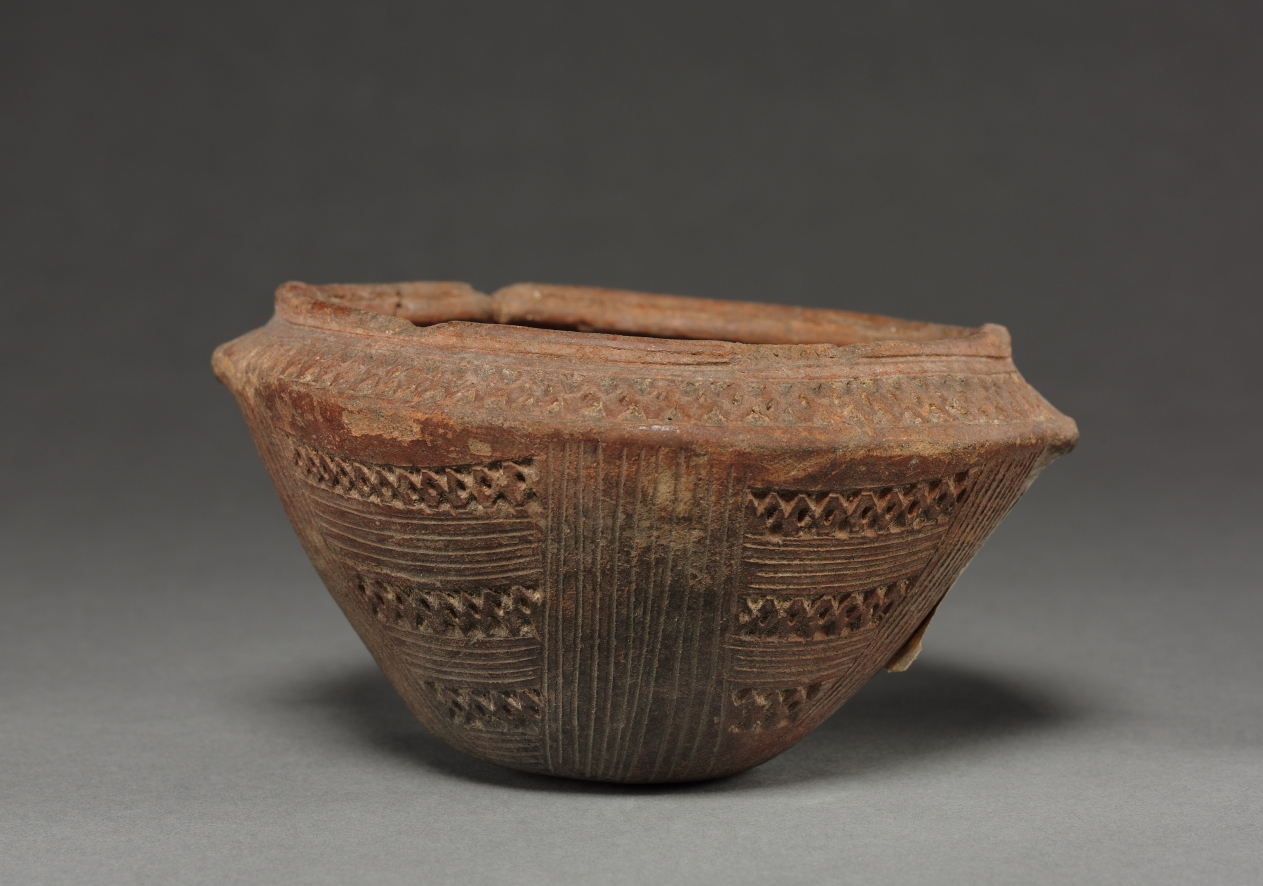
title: Jar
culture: Colombia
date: before 1550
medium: red ware with incised patterns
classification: Ceramic